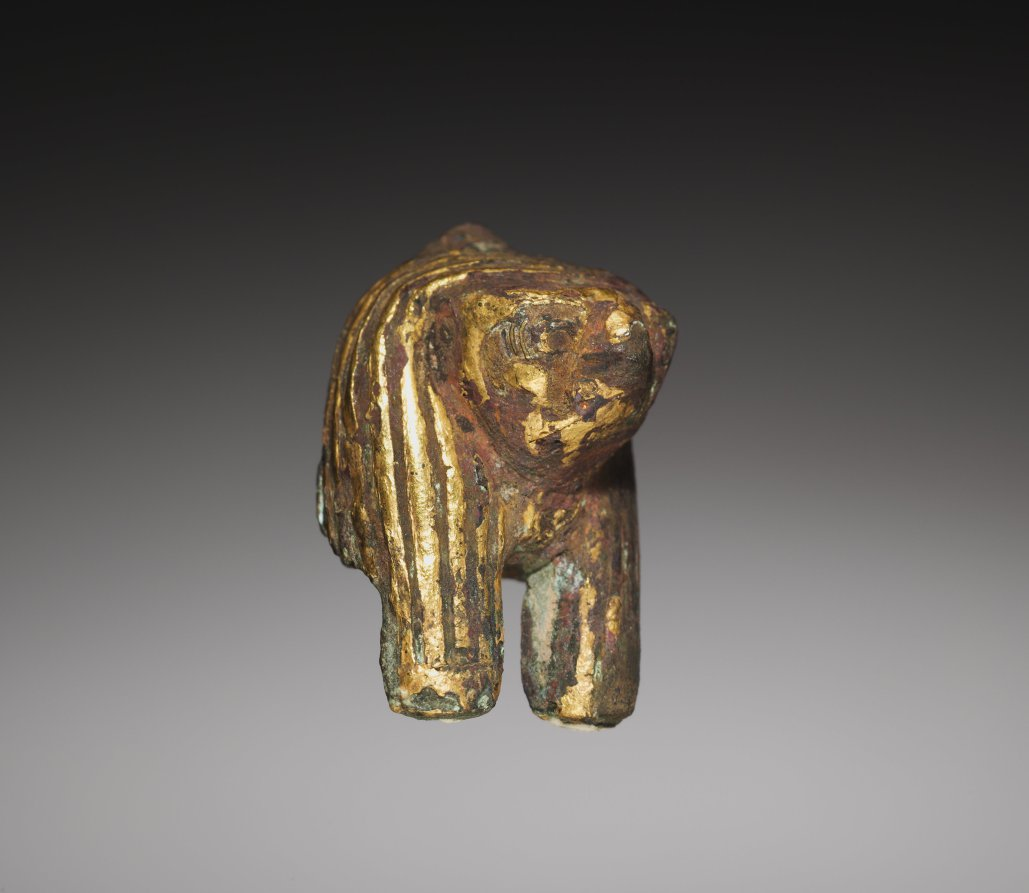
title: Falcon's Head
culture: Egypt, New Kingdom (1540–1069 BCE), Dynasties 18–19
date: 1350–1250 BCE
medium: face of bronze inlaid with gilt copper, wig of black copper (?) with copper striations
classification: Sculpture